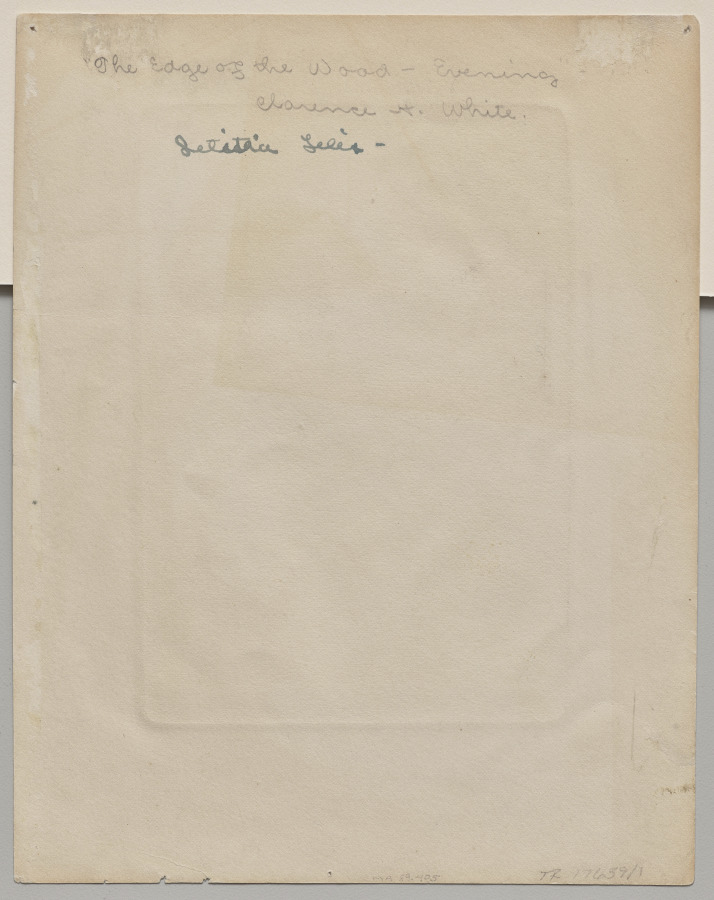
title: The Edge of the Wood - Evening (Letitia Felix)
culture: America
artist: Clarence H. White (American, 1871–1925)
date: 1900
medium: photogravure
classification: Photograph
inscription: Written in pencil on recto: "Clarence H. White [signed] '00"; in pencil on verso: " 'The Edge of the Wood-Evening'- / Clarence H. White"; in pen on verso: "Letitia Felix"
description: Clarence H. White experimented with an array of artistic media that blurred the lines between photography, drawing, and printmaking. Here are two examples of that experimentation: a platinum print on the left and a photogravure on the right. White was likely drawn to both processes for their broad tonal range and interaction of image and paper. To create platinum prints, a light-sensitive liquid emulsion is applied to and absorbed by the paper. The image forms within the paper’s fibers, resulting in a matte appearance. Because photogravures are printed like an etching, the image is formed with ink impressed onto the paper’s surface.